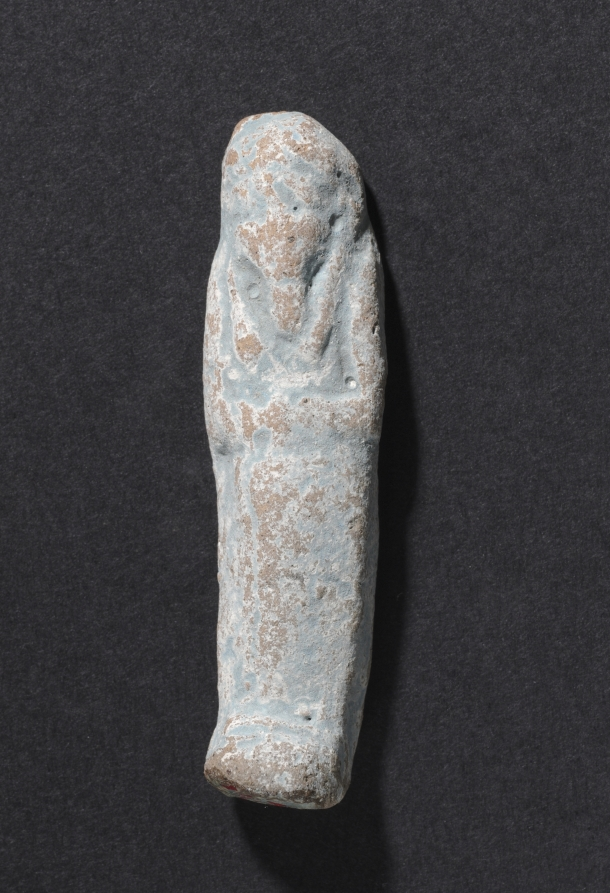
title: Shawabty of Ditamenpaankh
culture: Egypt, Late period (715–332 BCE), Dynasty 25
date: 715–656 BCE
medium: terracotta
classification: Funerary Equipment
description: High demand for shawabtys in the Late Period, a time when as many as 400 or more shawabtys were placed in the tomb with the deceased, gave rise to a specialized container for storing them: the shawabty box. This example is inscribed for the lady of the house, Ditamenpaankh, and was probably one of a pair originally made for her. The single-masted boat on the box's lid is perhaps an allusion to the pilgrimage of the deceased to the holy city of Abydos, the cult city of Osiris, king of the dead. The shawabtys inside are crude, mass-produced examples cast in an open mold. Made of terracotta, their blue paint imitates more costly shawabtys made of faience. As for the shawabty spell, it has been removed from its traditional location on the shawabty's front and relocated onto the sides of box, where it needed only to be written once, thus expediting production.